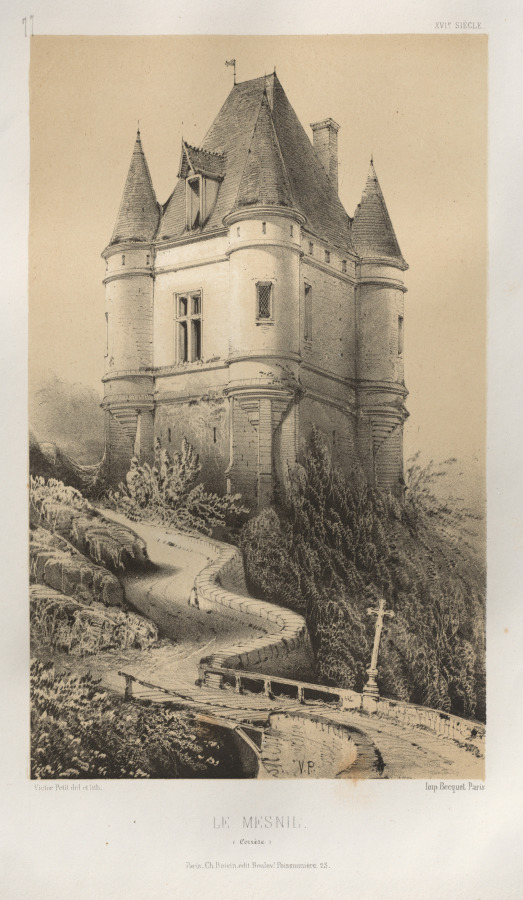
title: Architecture Pittoresque ou Monuments des XVeme. Et XVIeme. Siecles: Chateaux de France des XV et XVI Siecles: Pl. 77, Le Mesnil (Corrèze)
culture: France, 19th century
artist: Victor Petit (French, 1817–1874)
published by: Charles Boivin (publisher and editor); Lith de Godard a Paris (printer)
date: 1860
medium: lithograph with tint stone, from portfolio of 100 lithographs with tint stone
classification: Print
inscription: In graphite, above image, upper left: 77